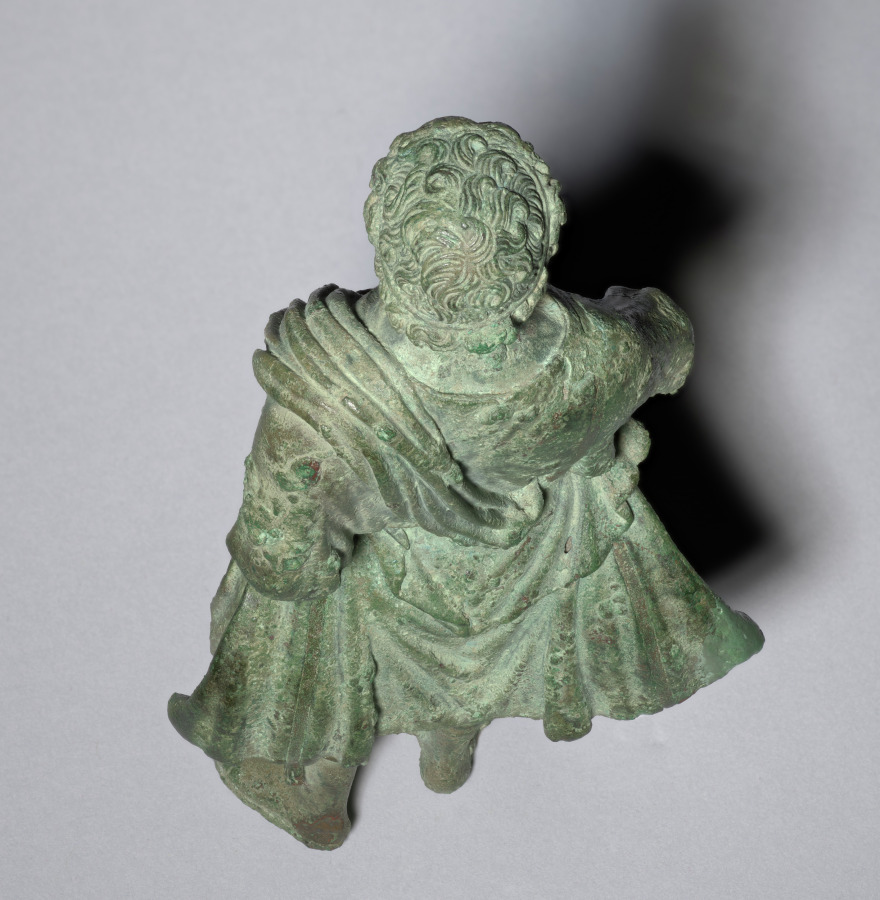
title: Lar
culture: Italy, Rome, Early Imperial period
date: 1–25 CE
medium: bronze with copper inlays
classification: Sculpture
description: This youthful bronze figure wears a short tunic with copper inlaid stripes and open-toed boots with animal-skin liners. The figure’s arms are missing, but based on other surviving examples, they likely held a libation dish and cornucopia. Even without these attributes, the figure can be identified through dress and stance as a type of Lar, or domestic deity, known as the Lar Familiaris (Household Lar), standing in a characteristic "quiet pose." Other types of Lares include the Lares Compitales and Lares Augusti (Lares of crossroads and of Augustus, respectively).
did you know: This statuette likely stood with other small bronzes in a household shrine called a lararium.